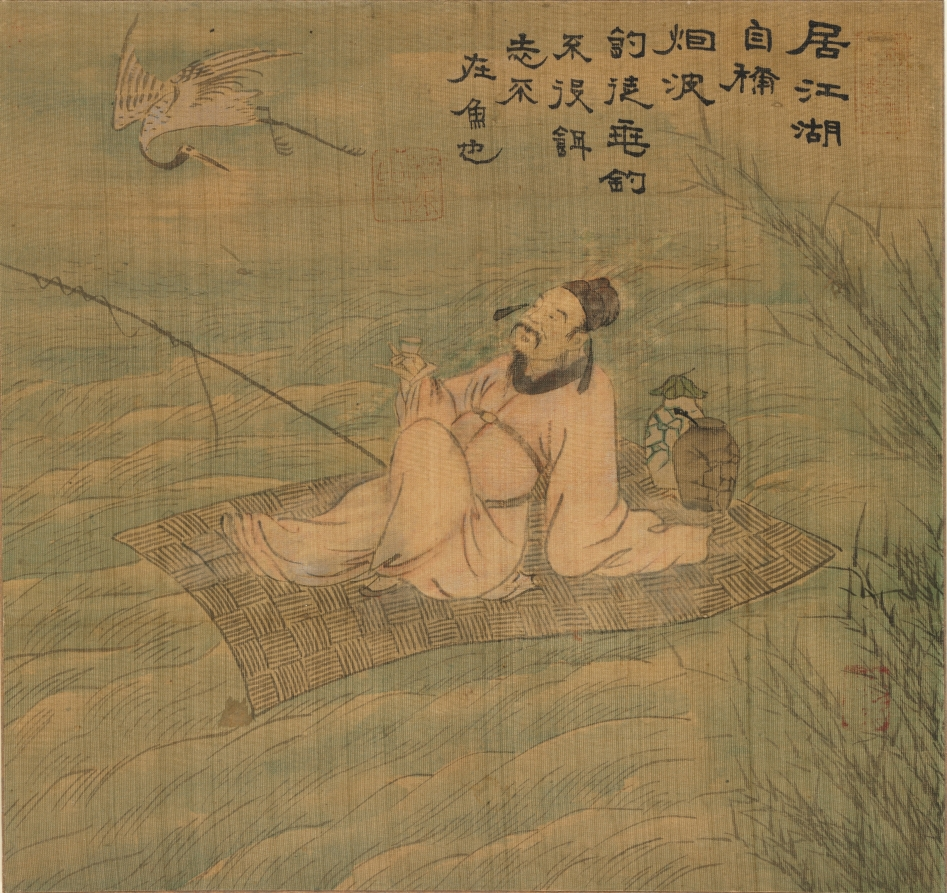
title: Poet Fisherman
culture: Korea, Joseon dynasty (1392–1910)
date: 1800s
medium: album leaf from a set; ink and color on silk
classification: Painting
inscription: 居江湖自稱烟波釣徒 垂釣不役餌 志不在魚也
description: This album leaf depicts the 8th-century Chinese official and Daoist scholar Zhang Zhihe sitting on a raft buffeted by waves. He drinks wine from a small cup, and gazes up at a crane flying above him. Behind him are two large jars, one covered with an overturned lotus leaf. The handle of a ladle emerges from the other. His fishing rod is balanced at his side, but its line is twisted uselessly. Based on its iconography, the painting is likely modeled after an image from an illustrated woodblock edition of the Chinese text Liexian Zuan (Biographies of Exemplary Immortals). The biographical inscription above him reads, "he is a recluse among the rivers and lakes. He calls himself ‘Fishing Disciple Amidst Mists and Waves.’ He is always fishing without bait for Zhi has no need for fish." A rectangular seal in relief appears to the right of the inscription, while a square seal in relief appears to the left. Neither is legible.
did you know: The lid that covers a tall crackle-patterned jar is a large lotus leaf.